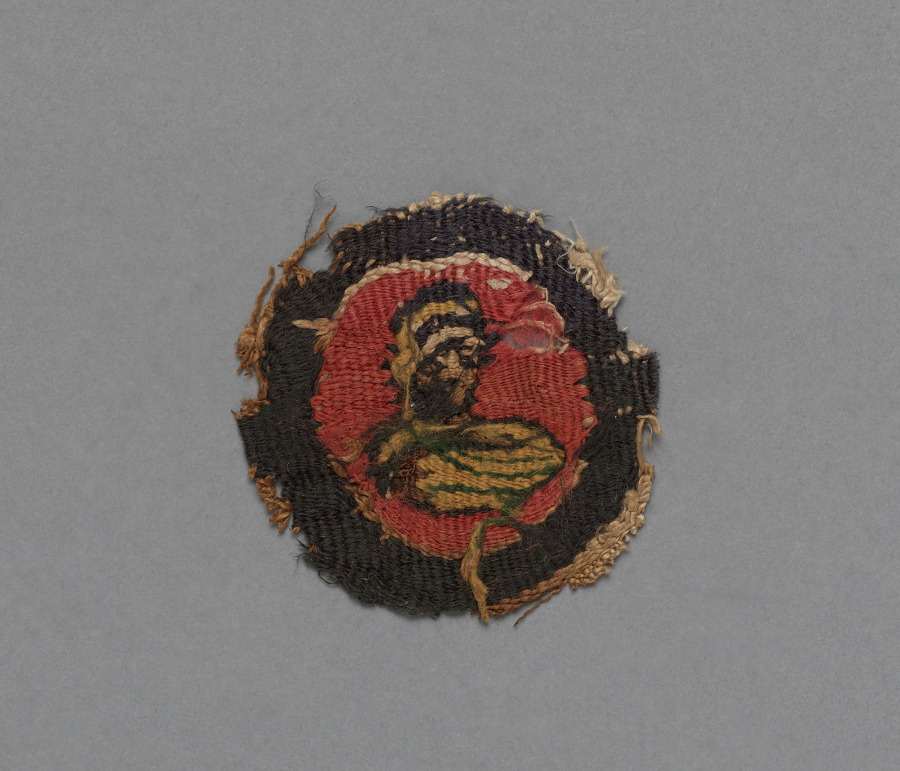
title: Fragment from a Tunic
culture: Egypt, 6th - 16th century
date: 500s - 1500s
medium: tabby weave with inwoven tapestry ornament, linen and wool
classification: Textile